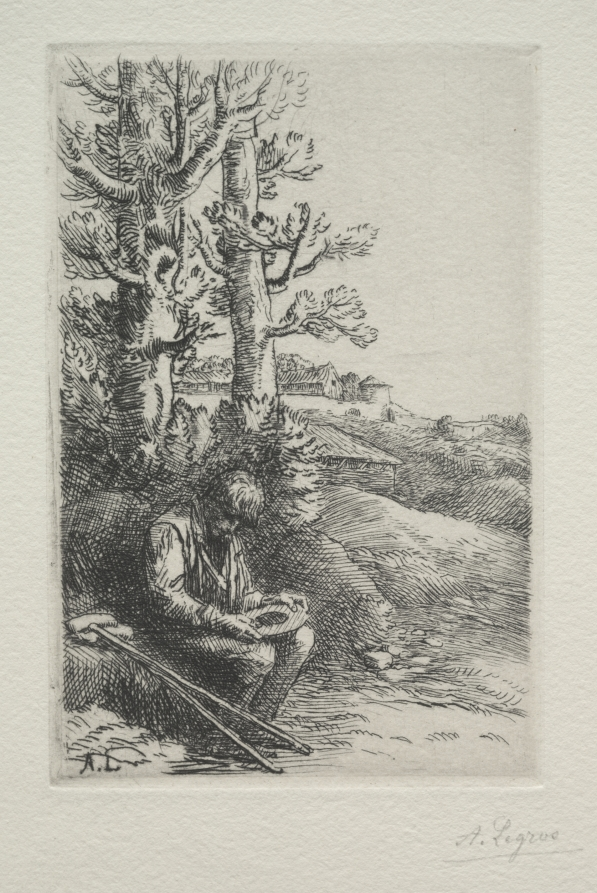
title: The Little Beggar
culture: France, 19th-20th century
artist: Alphonse Legros (French, 1837–1911)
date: c. 1857–1911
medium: etching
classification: Print